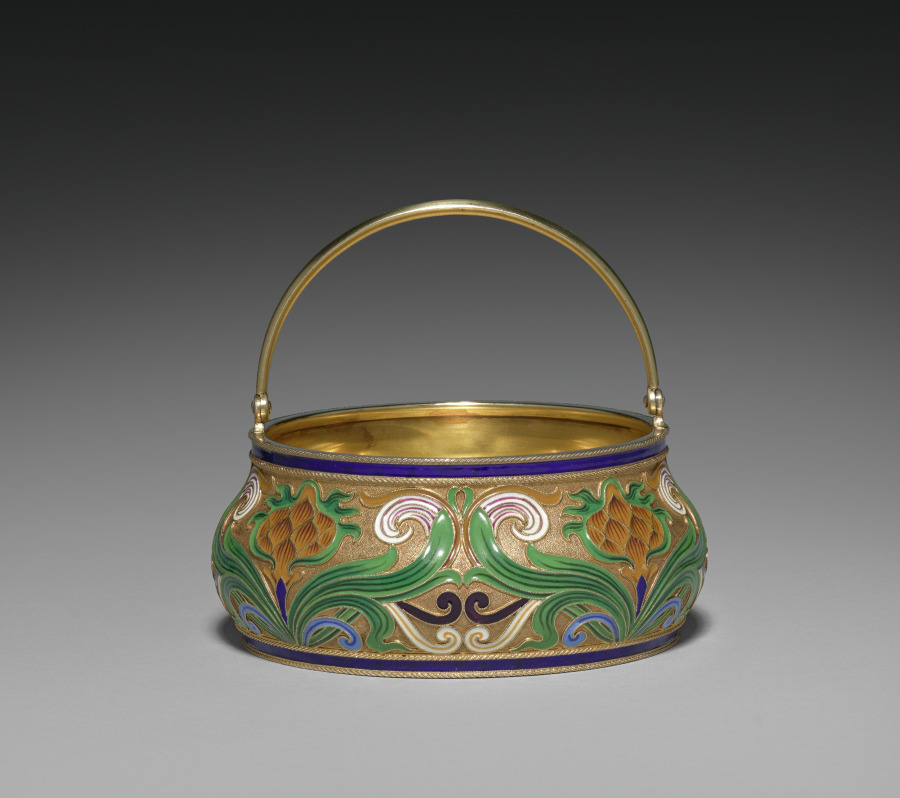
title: Jam (Varenye) Basket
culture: Russia, St. Petersburg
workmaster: attributed to Feodor Ivanovich Rückert (Russian, 1840–1917)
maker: House of Fabergé (Russian, 1842–1918)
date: 1887–96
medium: silver gilt, opaque cloisonné enamel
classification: Miscellaneous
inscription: 84, St. George [assay mark for Moscow, 1882-1896]; C. Fabergé (in Cyrillic); double-headed eagle [imperial warrant]; 10593 scratched.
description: A particularly Russian component of this tea service is this little basket, meant to hold fruit preserved in a sweet juice, called varenye. At Russian tea, varenye was strained and served over cakes or biscuits in a similar way that the English take jam with scones at high tea.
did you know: This jam (varenye) basket is part of a larger tea set.